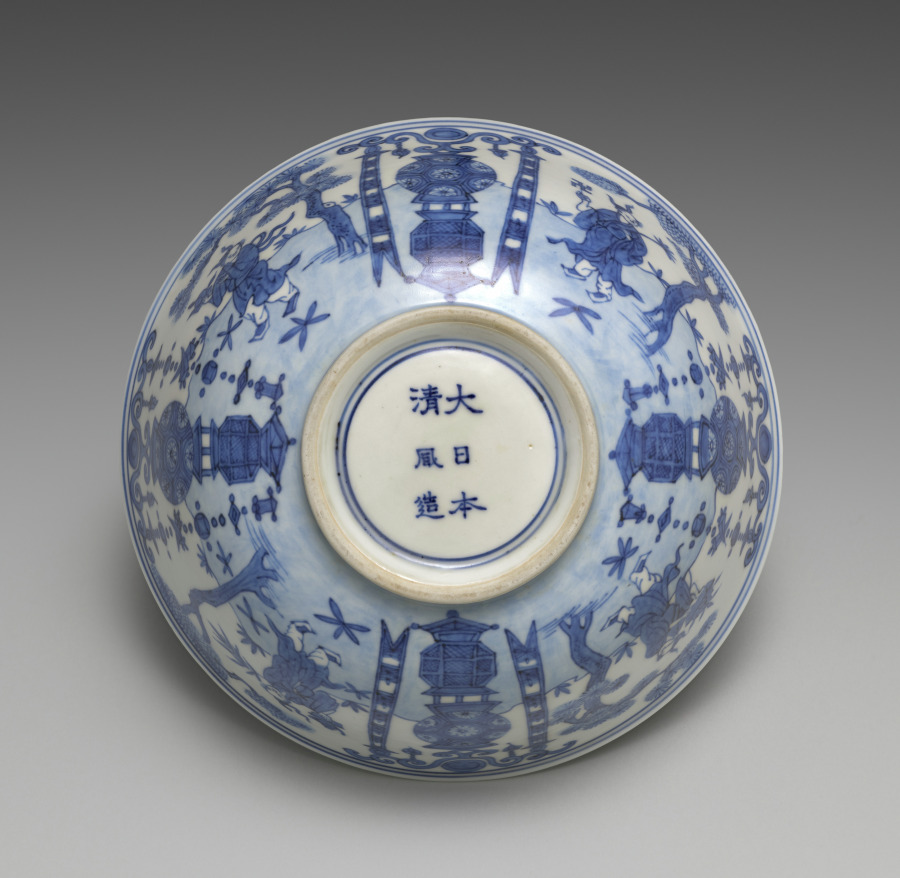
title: Bowl from Nesting Bowls with Daoist Immortals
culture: Japan, Meiji period (1868–1912)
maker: Seifū Yohei III (Japanese, 1851–1914)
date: 1893–1914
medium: Inner bowl from a set of three bowls; porcelain with underglaze blue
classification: Ceramic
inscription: 大日本清風造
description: Yohei III was capable of ink painting–like compositions in underglaze blue, as well as more decorative ones like that on this set of three nesting bowls. Bowls with very similar designs in five colors were produced in the reign of the Wanli emperor (reigned 1572–1620) during the Ming dynasty, and Yohei must have had direct access to one of these or to a close copy. A scene of Daoist immortals is presented on the bowls. On each one, the ground plane is defined with a blue wash. Four lanterns are evenly spaced around the bowl. Two are flanked with linked-piece metalwork banners of the seven treasures. The alternate altars are adorned with textile banners. In between them are four immortals, each standing beneath a tree with small plants surrounding his feet. Two of the immortals hold fruit on a tray. Another carries an elixir-filled ewer and a willow branch. The fourth holds a swastika (manji), here an auspicious symbol, and a flower. Curiously, the inscription inside each footring reads “Made by Seifu of Great Japan,” in emulation of the dynasty and reign inscriptions that appear on Chinese ceramics; however, one can also see through the translucent glaze another inscription, “Seifu Yohei,” written in large characters within a double band of blue on the largest bowl.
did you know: In the bottom of each bowl is a scene of two robed immortals who appear to stand on a precipice in a mountainous landscape high in the clouds, with celestial orbs over their heads.